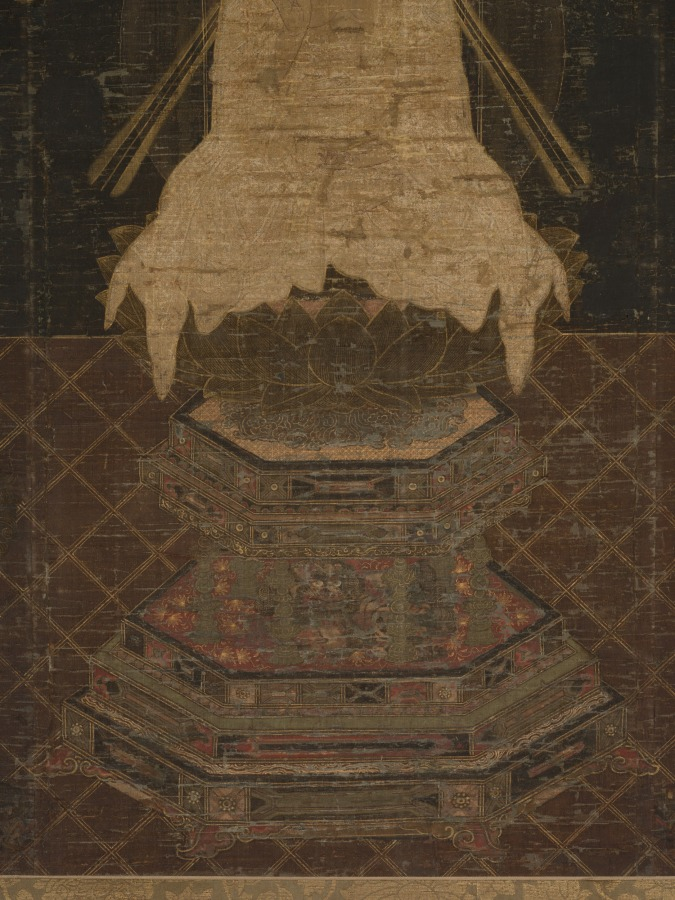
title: Shakyamuni Triad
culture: Japan, Kamakura period (1185–1333)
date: c. 1200–1333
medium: hanging scroll; ink, color, gold and cut-gold on silk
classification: Painting